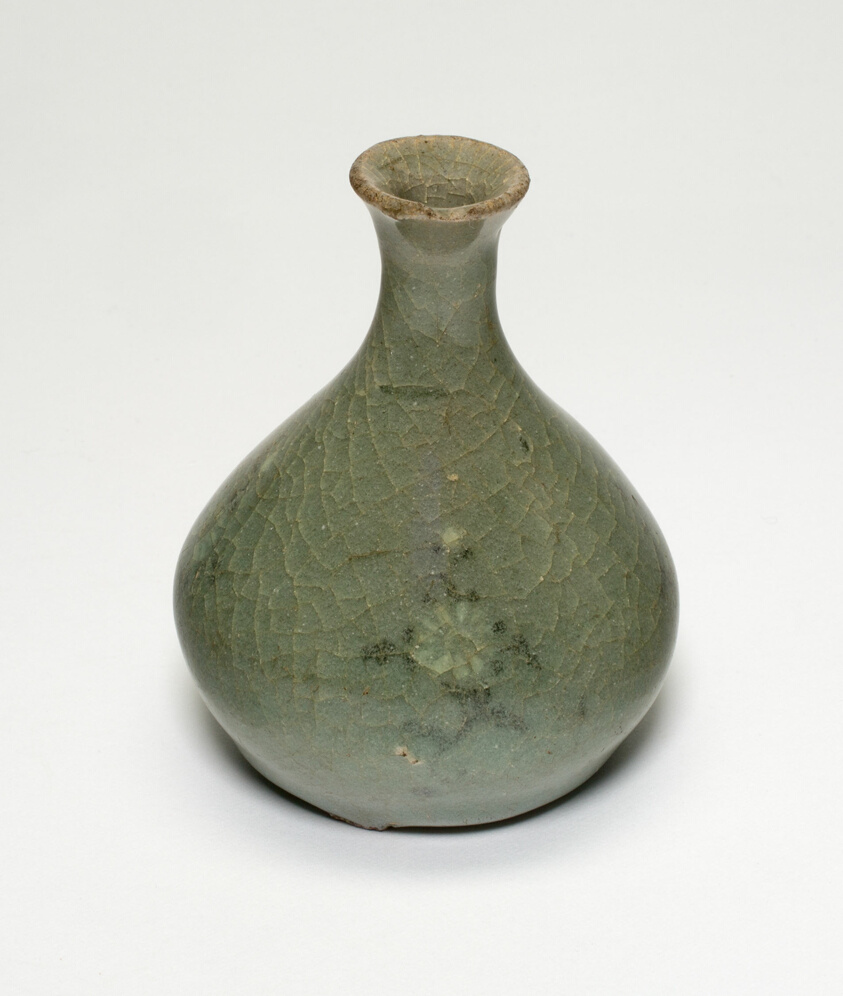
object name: Decorative Arts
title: Vase with Chrysanthemum Flower Heads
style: Korean (culture or style)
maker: Korea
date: Goryeo dynasty (918–1392), mid–13th century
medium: Celadon-glazed stoneware with underglaze inlaid decoration of black and white clays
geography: Korea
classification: vase; stoneware; vessel; asian art; ceramics; decorative arts